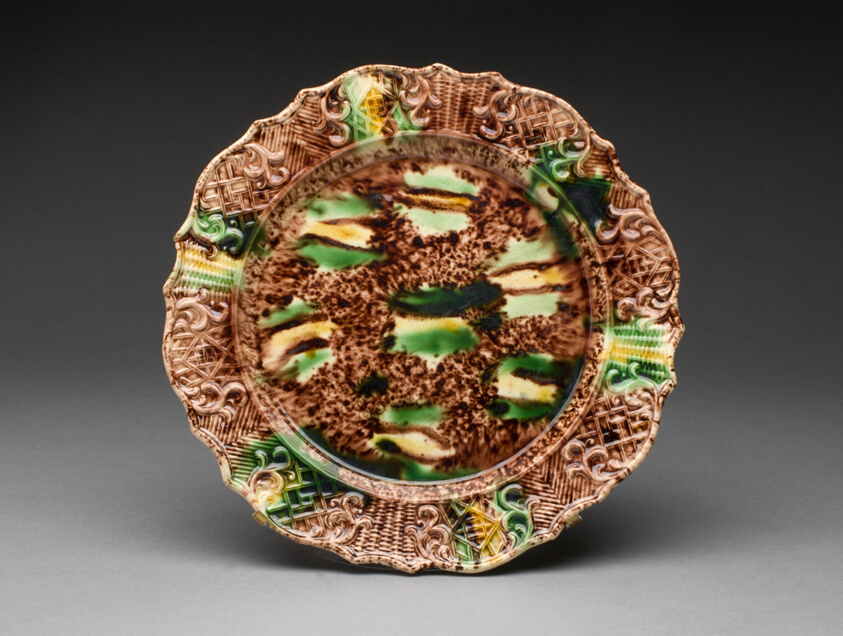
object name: Ceramics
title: Plate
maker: England, Staffordshire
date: 1760/70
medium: Lead-glazed earthenware (creamware)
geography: Staffordshire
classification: plate (general, dish); dish (vessel); ceramics; european decorative arts; creamware; earthenware; lead-glazed earthenware